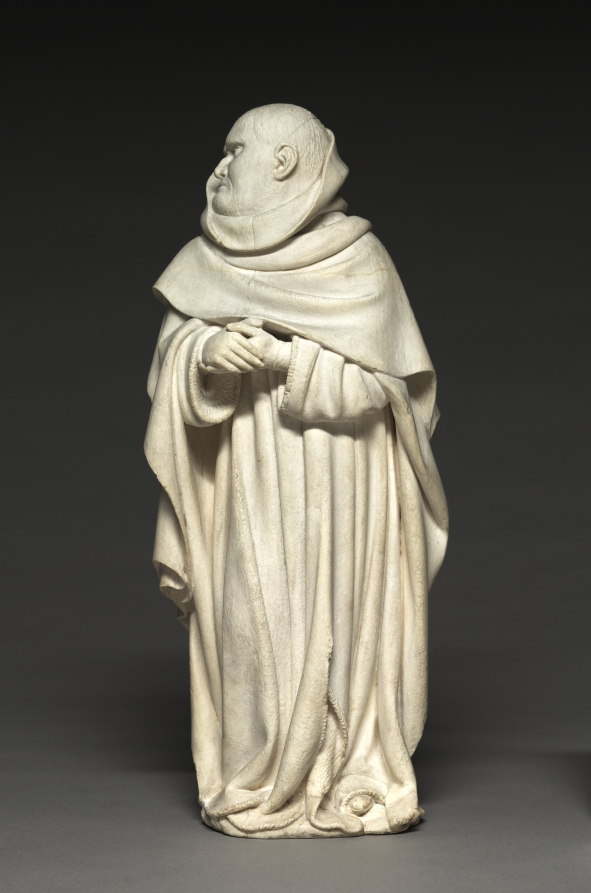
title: Mourner from the Tomb of Philip the Bold, Duke of Burgundy (1364–1404)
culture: Netherlands, active Dijon, 15th century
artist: Claus de Werve (Netherlandish, 1380–1439)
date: 1404–10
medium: vizille alabaster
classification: Sculpture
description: This figure comes from the tomb of Duke Philip the Bold from the church of Champmol near Dijon (Burgundy, France). Philip, who founded the monastery and designated it as his burial place, hired the best artists, many of whom came from the Netherlands. While the commission was given in 1381, the work was not completed until 1410, six years after the duke’s death. This mourner is unusual for the time because it is not carved as a static low relief on the pedestal of the tomb but interact with the viewers and their fellow procession members. The lifelike quality of the figure is due in large part to the alabaster. Its softness allowed artists to carve details into the material, and the transparent, milky white stone could also be polished to a high gloss.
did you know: The use of alabaster in the late Middle Ages began in the 1300s with court art in the circles of French kings, especially in the field of funerary sculpture.